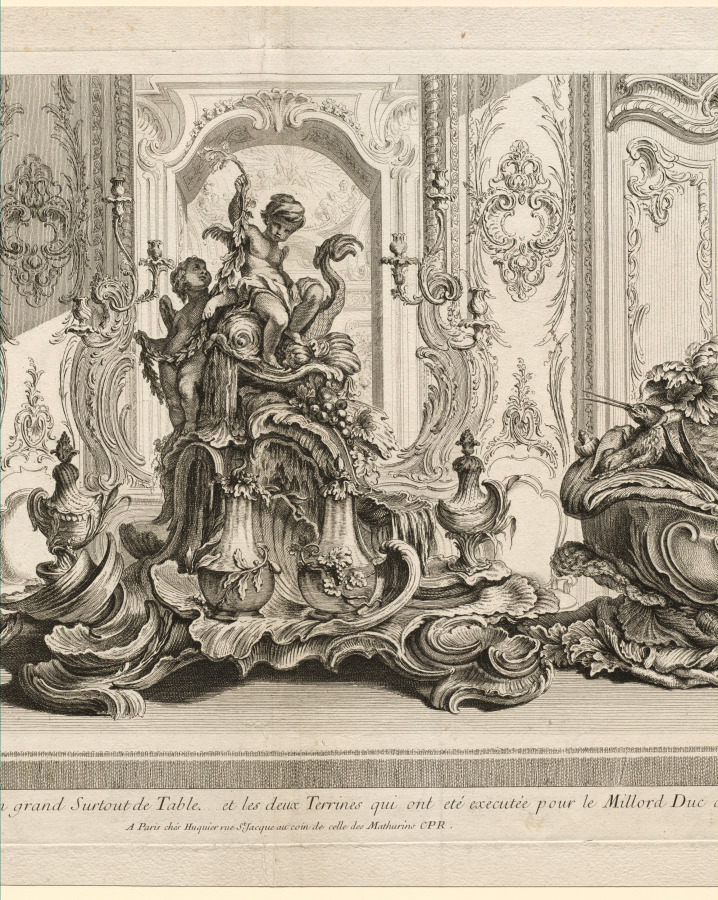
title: Silver Sculptural Project for a Large Centerpiece and Two Tureens Which Have Been Executed for His Lordship the Duke of Kingston, plate 115 from Works of Juste-Aurèle Meissonier (Oeuvre de Juste-Aurèle Meissonier)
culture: France, 18th century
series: Works of Juste-Aurele Meissonier (Oeuvre de Juste- AurPle Meissonier), plate 115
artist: Gabriel Huquier (French, 1695–1772)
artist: after Juste-Aurèle Meissonnier (French, 1695–1750)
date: c. 1735–37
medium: etching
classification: Print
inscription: J. A. Meissonier inv./Huquier Sculp.; Inscriptions: Below title: A Paris chJs Huquier rue St Jacque au coin de celle des Matburins CPR.; upper right: 115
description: In addition to documenting an important commission, this etching endorses the designer’s stylish products by associating them with social status. Meissonnier’s name appears below the image on the left, and the large inscription identifies the illustrious patron, the Duke of Kingston, known well in Parisian society. Perhaps functioning similarly to a magazine advertisement today, the fashionable rococo-style scene invites viewers to imagine themselves as the owners of the luxurious tableware. Contrary to the inscription at the bottom of the sheet, the etching actually shows two views of only one of the tureens made for the Duke of Kingston (the tureen displayed nearby). The tureen not depicted features a crab instead of a lobster on the lid. The grand sculptural centerpiece was probably never produced.